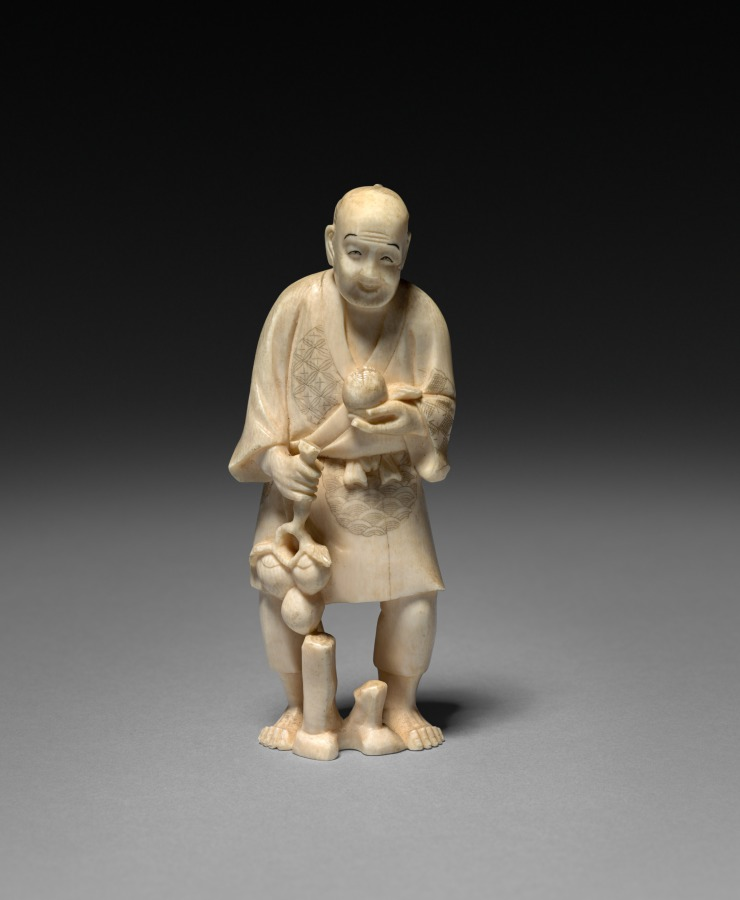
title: Man Holding Fruit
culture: Japan, Meiji period (1868–1912)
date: early 1900s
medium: ivory, pigment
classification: Ivory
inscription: 光江